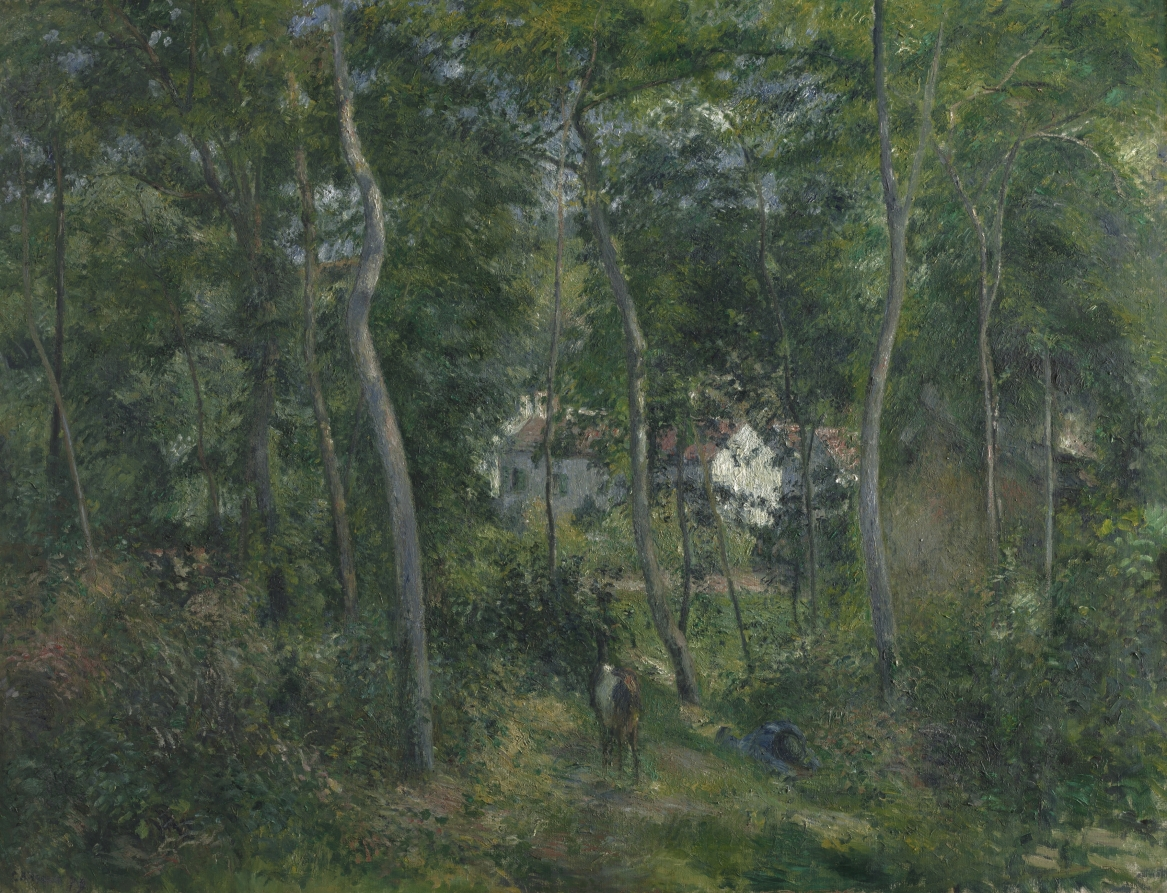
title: Edge of the Woods Near L'Hermitage, Pontoise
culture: France, 19th century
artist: Camille Pissarro (French, 1830–1903)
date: 1879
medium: oil on fabric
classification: Painting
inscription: Signed lower left: C. Pissarro 79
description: Born to a French-Jewish family on St. Thomas island in the Caribbean, Pissarro painted this monumental landscape when he was desperately poor and struggling to sell his paintings. It depicts a man slumbering in the sun-dappled backwoods of the Hermitage, a rural village near Pontoise, where the artist had been living since 1872. Restricting his palette to pure hues, Pissarro applied brushstrokes in systematic diagonal patterns, producing an effect that he likened to knitting. This canvas was included in the fourth Impressionist exhibition of 1879.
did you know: A goat seen from the back standing next to the figure in blue laying in the grass invites the viewer to step inside this serene and beautiful setting.